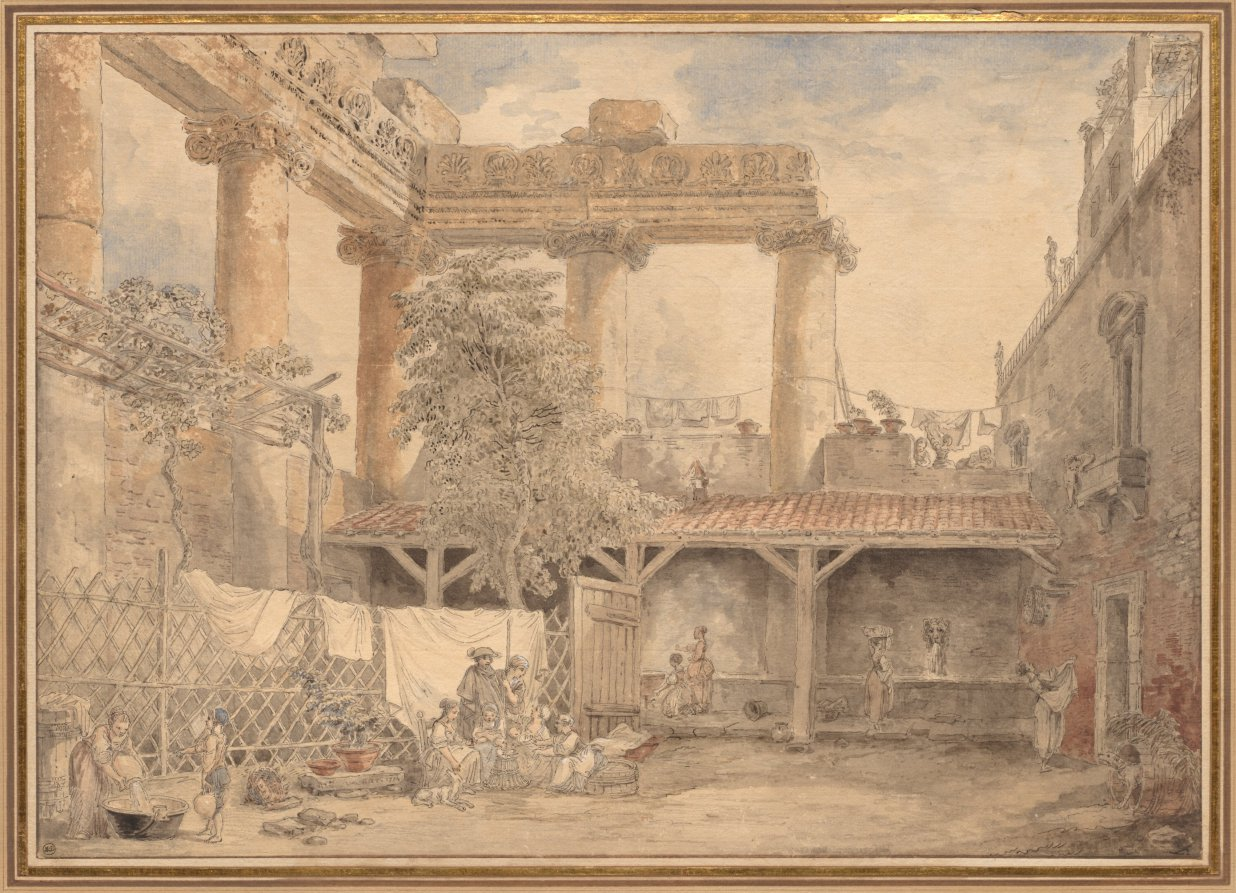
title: Roman Ruins, Villa Pamfili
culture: France, 18th century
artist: Hubert Robert (French, 1733–1808)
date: 1774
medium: Pen and black ink and watercolor with black chalk underdrawing and heightened with white gouache on cream laid paper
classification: Drawing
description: While living in Italy, Robert developed a fondness for classical architecture, making countless drawings that served as the basis for paintings and prints for decades after he returned to Paris. Denis Diderot (1713–1784), a French philosopher and art critic, nicknamed the artist “Robert of Ruins” due to Robert’s enduring interest in the subject. A quaint commentary on the passage of time, this drawing portrays the activities of contemporary life among the weathered remains of an ancient Roman building. Despite the traditional title of the drawing, there is no evidence that such ruins ever existed at the Villa Pamphili. The towering columns supporting a decorative frieze may instead derive from the Roman Forum’s Temple of Saturn.